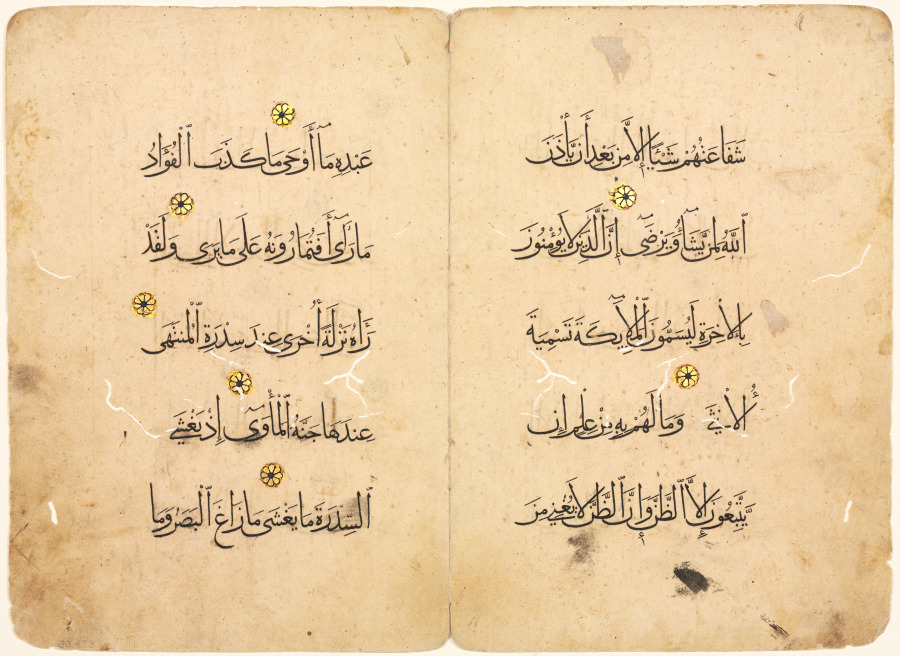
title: Qur'an Manuscript Folio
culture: Egypt, Mamluk sultanate (1250–1517)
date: 1300s–1400s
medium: ink, gold, and colors on paper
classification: Drawing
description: It is through the Arabic language that the Qur’an was revealed to the Prophet Muhammad in the 600s. As a result, calligraphy is celebrated as the highest form in Islamic art. The verses (ayat) written here come from the 53rd chapter (surah) of the Qur’an, also known as the Surah An-Najm, the Chapter of the Star. The significance of the Qur’an provides an explanation for the importance of calligraphy, but its use was not restricted to religious texts. Many objects in the museum's Islamic collection bear calligraphic inscriptions and come from secular contexts, displaying the versatility and creativity of this art form.